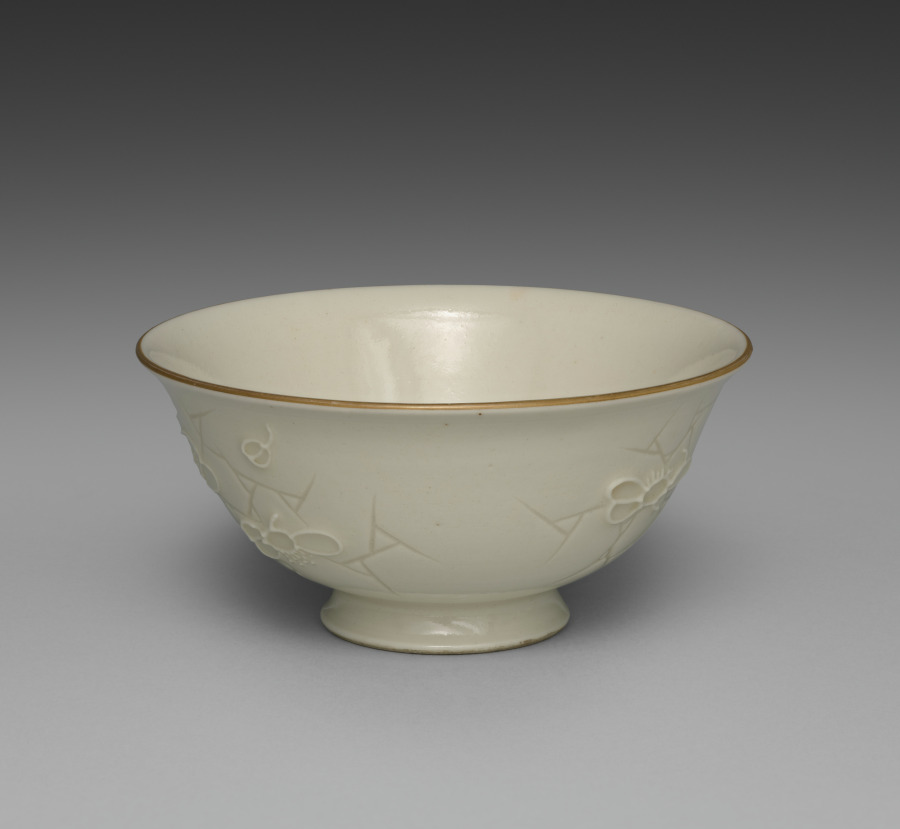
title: Bowl from Dining Set with Plum Blossoms and Cracked-Ice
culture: Japan, Meiji period (1868–1912)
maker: Seifū Yohei II (Japanese, 1844–1878)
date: c. 1875–78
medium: Porcelain with molded designs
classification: Ceramic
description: Each item in this set has a delicate low-relief design of flowering plum branches over scattered, intersecting lines meant to resemble the cracked-ice surface of a frozen body of water and is signed on the base in gold pigment. While Yohei II produced many fine works in underglaze blue, like those produced by Kiyomizu Shichibei, he also made works in quite different styles later in his career, from the early 1870 s. In 1873, he was appointed purveyor to the Industrial Center of Kyoto Prefecture, a designation associated with Kyoto’s efforts to reach an international market through the port of Kobe; and from 1875 until his death, he was involved in national-level projects to present Japanese ceramics across the world. It was during this period that Yohei III was apprenticed to Yohei II, and it has been suggested that this set may in fact be an early example of Yohei III’s work, which he signed with his teacher’s name. Decorated with flowers resembling Japanese textile motifs, the set calls to mind the design of Yohei II’s pair of vases with plum blossoms in the Victoria and Albert Museum. Here, the elaborate trees created for a formal public exhibition setting have been translated into the approachable blossoms of the genteel domestic environment. While the designs are consistent across the pieces, each raised flower petal and pistil and each incised line in the ice was done by hand, so the cups, bowls, and dishes are similar yet unique. The bottoms of two boxes once identified the set’s owner, but the information has been deliberately obscured with black ink. However, inscriptions still visible appear to indicate two occasions, once at the end of July 1886 , and once again in June 1916 , when parts of the set were requested from Hokura in Niigata Prefecture. The location corresponds to a neighborhood in the present-day city of Jōetsu. The surname Tsuji 辻 also appears on a paper tag affixed to one of the box cloths. Future research may possibly reveal more about their provenance. A vase by Yohei III in a private collection combines the formal grandeur of the Yohei II vases in the Victoria and Albert Museum with the gentler design of this dining set, placing flowering plum trees against soft, scalloped-edge clouds resembling those in golden screens.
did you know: The dining wares have a creamy white coloration that the four boxes containing them identify as Korean in style.